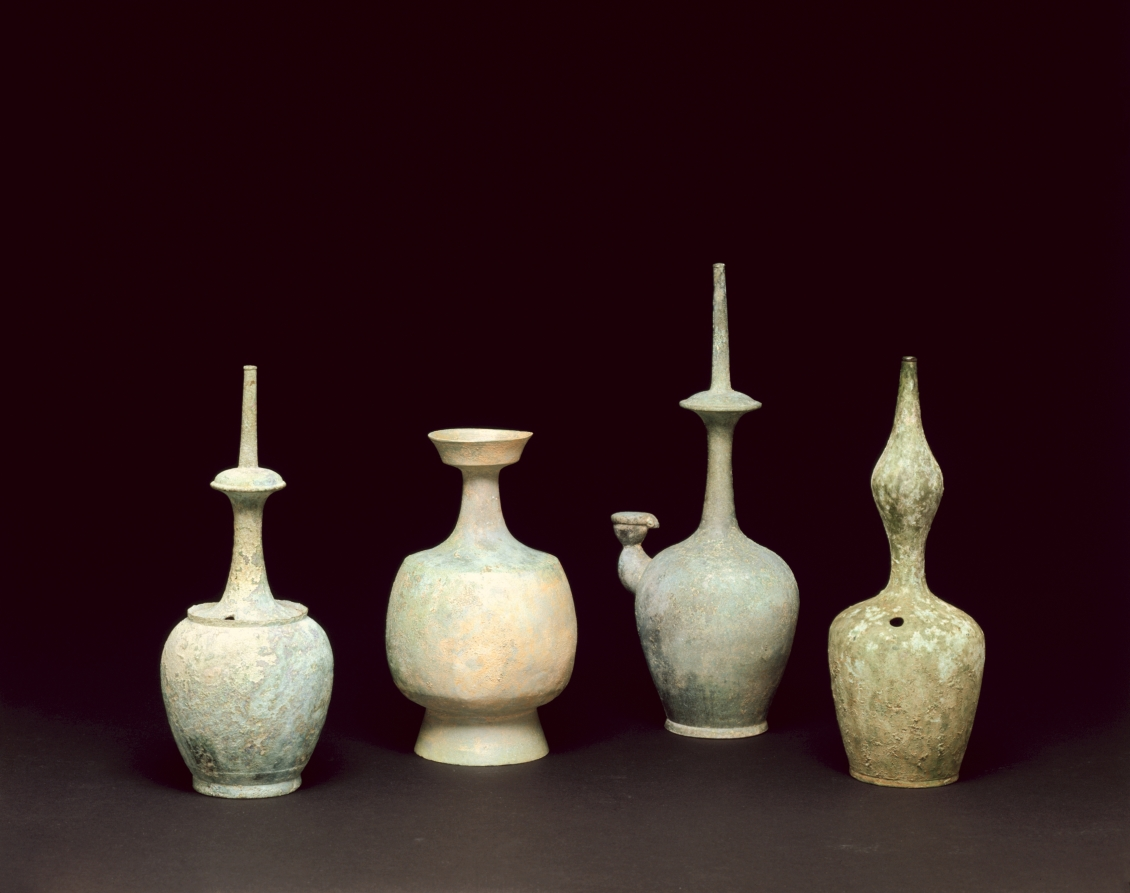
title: Water Ewer for Rituals (Kundika)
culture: Korea, Goryeo dynasty (918–1392)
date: 1100s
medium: bronze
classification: Metalwork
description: Known as kundika in Sanskrit, this distinctively shaped vessel served to purify a sacred space and to invoke a deity. In Korean Buddhist art, it appears primarily as an attribute of the Bodhisattva Avalokitesvara (Gwaneum in Korean). By the 12th century, however, it came to serve as aristocrats’ fancy water container for everyday use.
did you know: This distinctively shaped vessel is called a kundika in Sanskrit, simply referring to a water bottle.